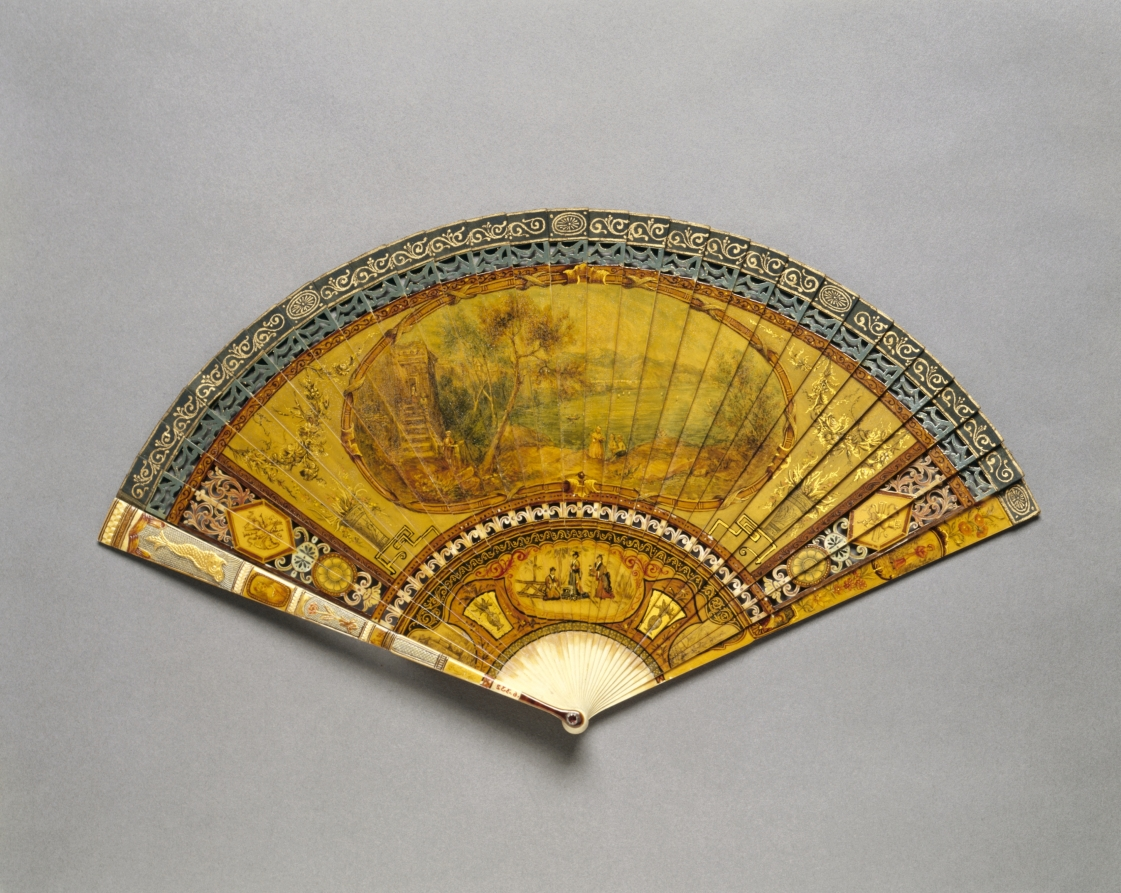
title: Fan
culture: France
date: c. 1888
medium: wooden frame painted and lacquered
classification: Miscellaneous